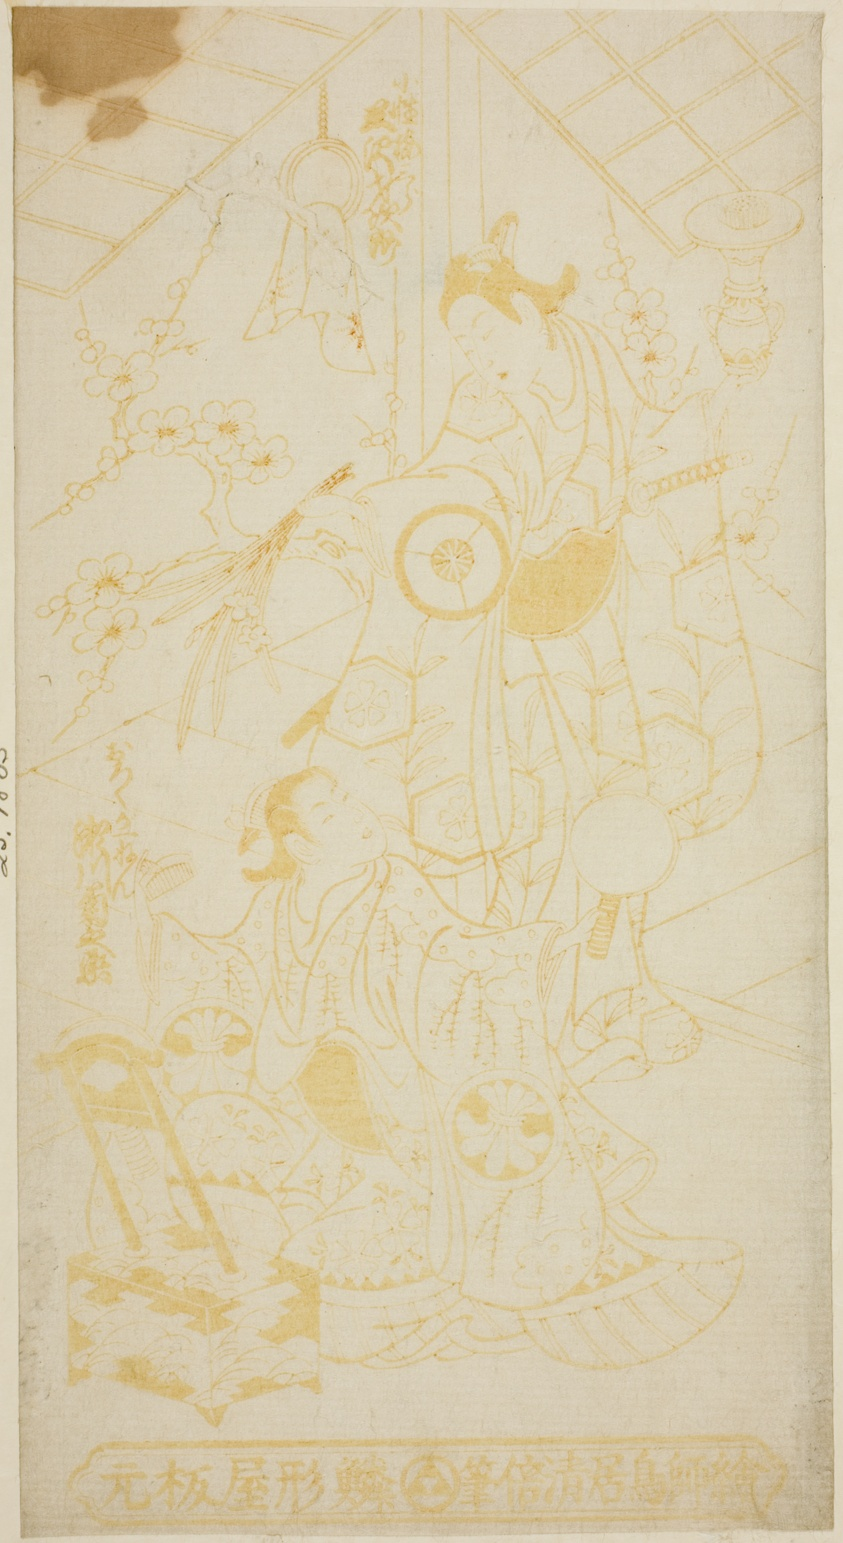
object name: Print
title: The Actors Tamazawa Saijiro I as the pageboy Umezaburo and Segawa Kikunojo I as Oroku in the play "Sazareishi Suehiro Genji," performed at the Nakamura Theater in the first month, 1744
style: Japanese (culture or style)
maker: Torii Kiyomasu II (Japanese, 1706 (?)–1763 (?))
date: 1744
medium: Color woodblock print; hosoban, benizuri-e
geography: Japan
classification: woodblock print; print; asian art